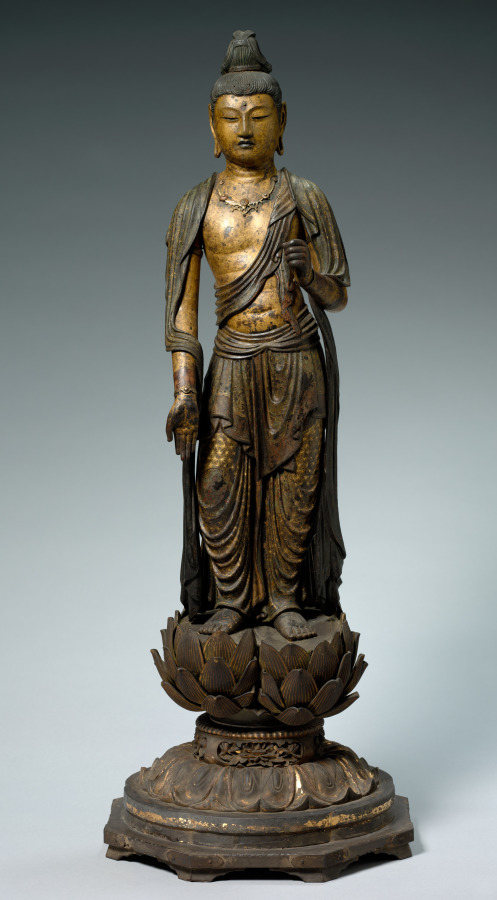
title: Bodhisattva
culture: Japan, Kamakura period (1185–1333)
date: c. 1200–1250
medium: lacquered wood with color, gilt copper, and cut-gold (kirikane)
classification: Sculpture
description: This sculpture represents one of two bodhisattvas who flank the Buddha Amida, the Buddha of Infinite Life and Light. He has one foot in front of the other and his right leg bent at the knee to show that he is in motion; his torso also sways. He accompanies Amida as he descends to collect a dying person who has asked to be born after death into Amida’s Pure Land, a place conducive to progressing along the path to enlightenment.